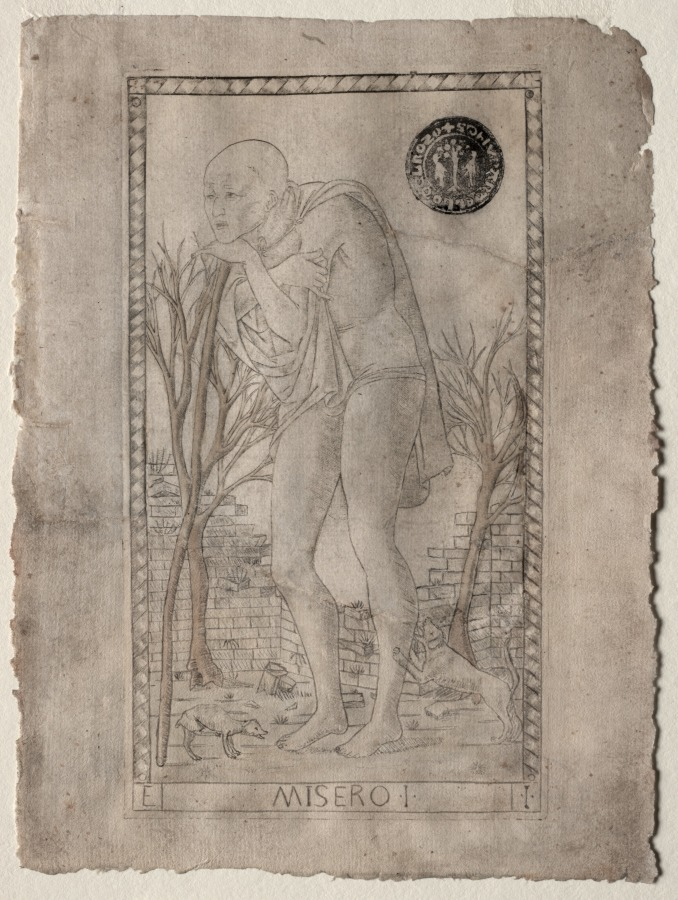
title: Tarocchi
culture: Italy, Ferrara, 15th century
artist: Master of the E-Series Tarocchi (Italian, active 1460s)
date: before 1467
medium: engraving hand-colored with gold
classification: Print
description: Scholars generally agree that this set of 50 engravings was an educational tool, perhaps devised by a humanist scholar to visually describe a fifteenth-century philosophical model of the cosmos. It was believed that the universe was a ladder-like structure that began with the beggar and rose through the ranks of humankind, the muses, the liberal arts, the virtues, and the planets, until it finally reached the pinnacle, the dwelling place of God. Reflecting this order, the engravings can be divided into five groups distinguished by the letters E, D, C, B, A, respectively marking the Conditions of Man (five serfs and five aristocrats); Apollo and the nine Muses; the seven Liberal Arts (with three added disciplines—Poetry, Philosophy, and Theology); the seven Virtues (with three personifications of cosmic principles called "Genii"); and the Firmaments of the Universe (eight cosmic spheres and two prime movers—Primo Mobile and Prima Causa). Each unit in the Tarocchi set is thus structured around the number ten which—according to the Greek Philosopher Aristotle—was a perfect expression of Divine unity. Designed, engraved, and hand-colored in gold by artists and craftsmen in Northern Italy whose names are unknown to us today, the series exists in two versions. The museum's set, known as the "E" series (named for the letter in the lower left corner of the prints in the first group of ten), is believed to be the first version.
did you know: The Italian word tarocchi (tarot) refers to a gambling game; though once thought to describe the function of this set of engravings, today it is understood to be a misnomer.